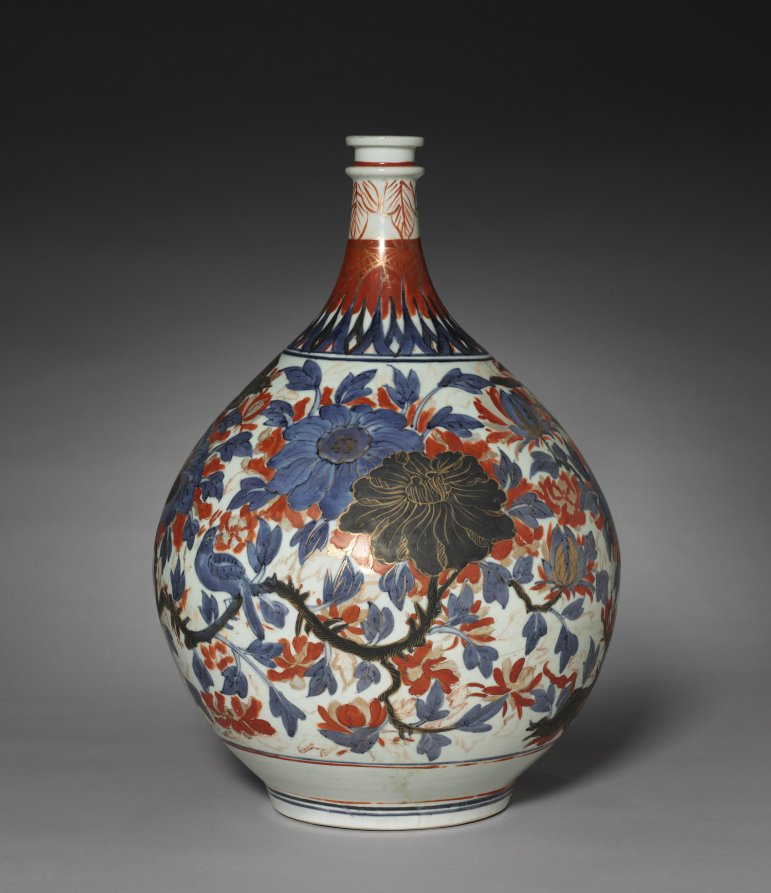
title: Apothecary's Bottle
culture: Japan, Edo period (1615–1868)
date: 1670s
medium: porcelain with underglaze blue and overglaze color enamels (Hizen ware, Arita type)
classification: Ceramic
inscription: on bottom: "IC" (probably stands for Joannes Camphuys, 1634-1695).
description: The decoration of this white porcelain bottle was achieved through a multistep process. First, some decorative elements, like the deep blue forms, were applied with glaze and then fired. Enamels were brushed on to achieve the bright colors. This bottle was probably in the collection of Johannes Camphuys (1634-1695), who was in charge of the Dutch residential island of Deshima in Nagasaki harbor.